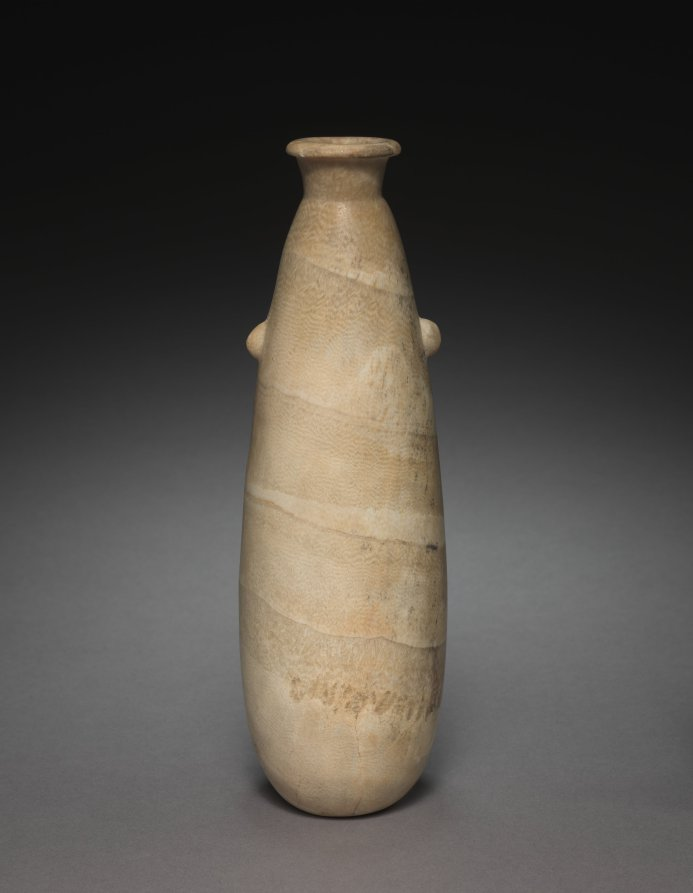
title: Alabastron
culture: Egypt, Late period (715–332 BCE), Dynasty 26 or later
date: 664–525 BCE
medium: travertine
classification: Vessels